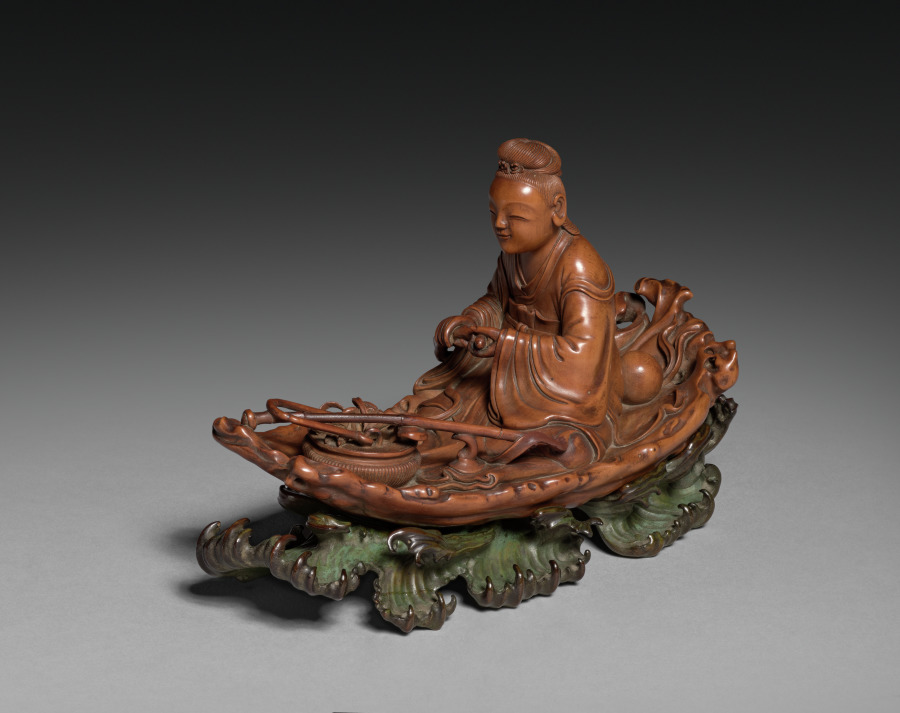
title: Figure of Daoist Immortal He Xiangu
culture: China, Qing dynasty (1644-1911)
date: 1700s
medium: Boxwood with colored ivory base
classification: Wood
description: He Xiangu is one of the Eight Immortals in the Daoist pantheon. She was thought to have been a real person who lived in the Tang dynasty, originally named He Qiong. As a teenager, she was instructed in a dream to eat powdered mica to become immune from death and to vow to remain unmarried. She did so and became an enlightened practitioner of Daoism. In this delicate carving, He Xiangu is placidly seated in a gnarled and knotty wooden raft amid green-tinted ivory waves. In front of her rests a bamboo basket filled with objects associated with Daoist immortality, while she holds a branch of lingzhi fungus.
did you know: Her basket contains plants and herbs used by Daoists for attempting to achieve immortality.